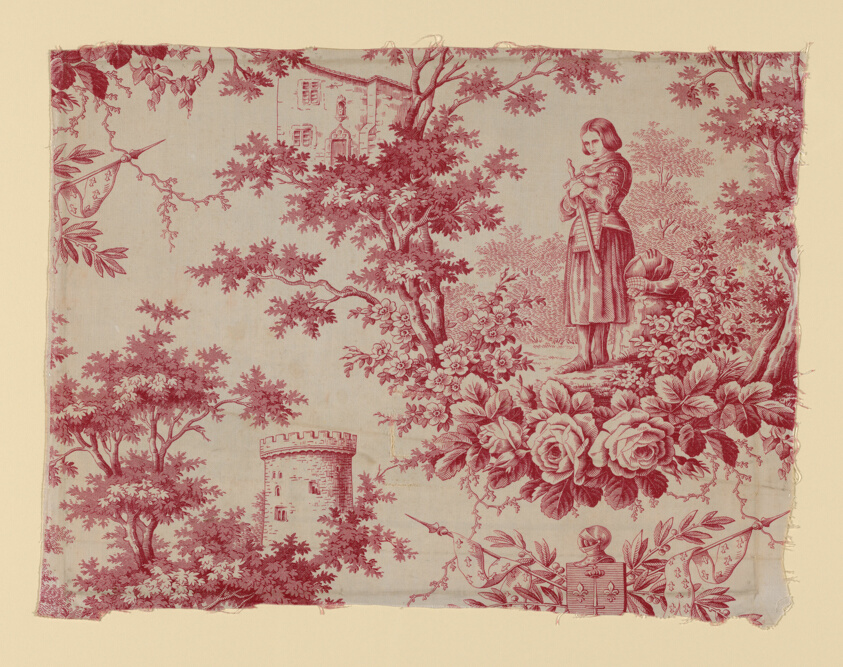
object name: Textile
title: Jeanne d'Arc (Joan of Arc)(Furnishing Fabric)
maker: After a sculpture by Marie Christine d'Orléans (French, 1813–1839); France, possibly Rouen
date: c. 1840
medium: Cotton, plain weave; copperplate printed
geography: France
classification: textile; weaving - printed; furnishing textile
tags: propaganda